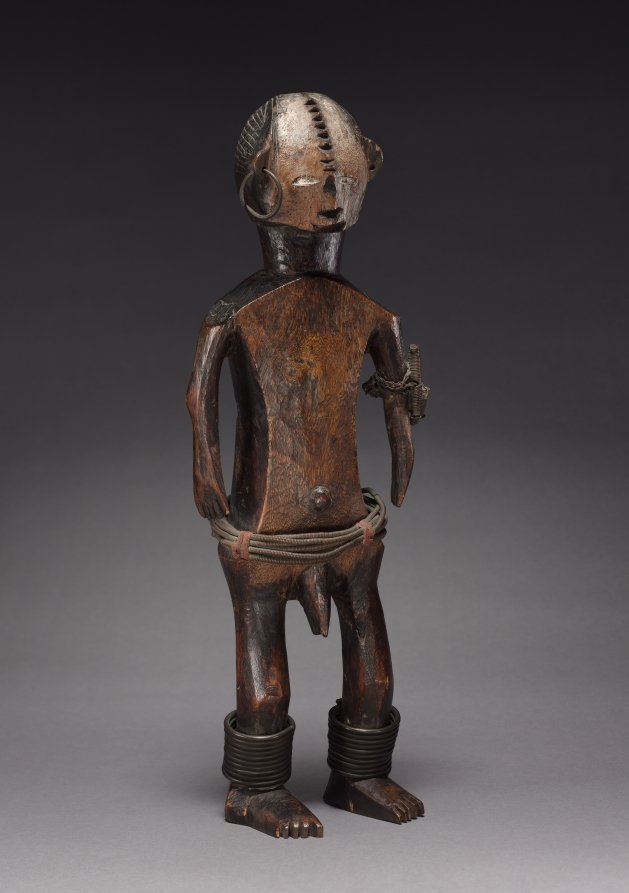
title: Male Figure of a Pair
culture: Africa, Central Africa, Democratic Republic of Congo, probably Ngbandi-style carver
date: late 1800s-early 1900s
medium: Wood, iron alloy, copper alloy, and cloth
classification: Sculpture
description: Carving of paired figures is quite well documented among the Ngbandi and its neighbors the Ngbaka-Minagende, where such sculptures are said to represent the mythical ancestor Seto and his sister-wife, Nabo. Field-based research cannot confirm the existence of figurative couples among the Ngbandi.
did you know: Odette Delenne, the collector of this pair, once stated that these figures reminded her of herself and her husband, René.